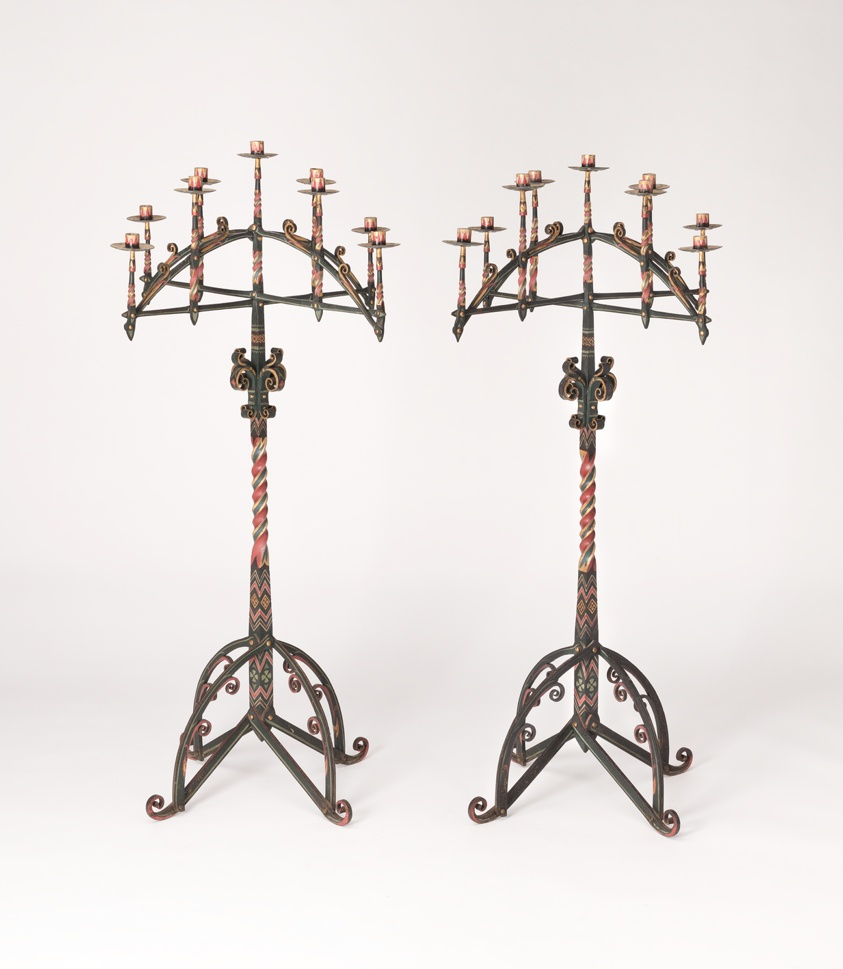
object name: Metalwork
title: Candelabra (One of a Pair)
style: gothic revival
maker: William White (English, 1825-1900)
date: c. 1860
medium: Painted bronze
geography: England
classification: candleholder - candelabra; candleholder; metalwork